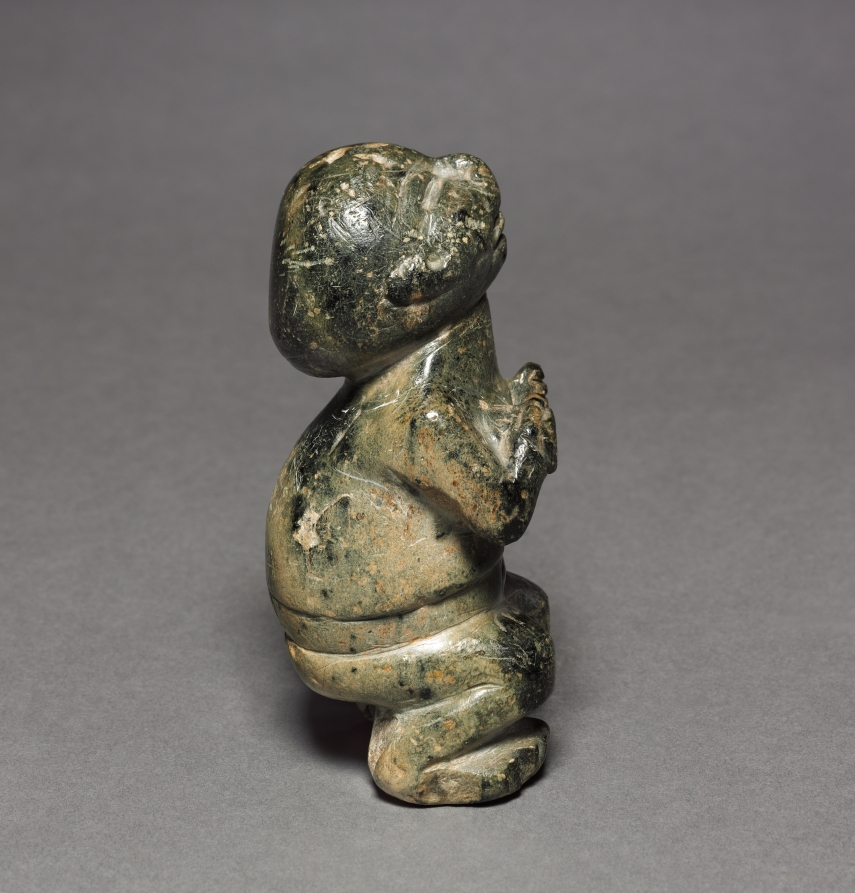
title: Crouching Figure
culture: Mexico, Guerrero, Olmec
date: 900–300 BCE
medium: serpentine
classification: Sculpture